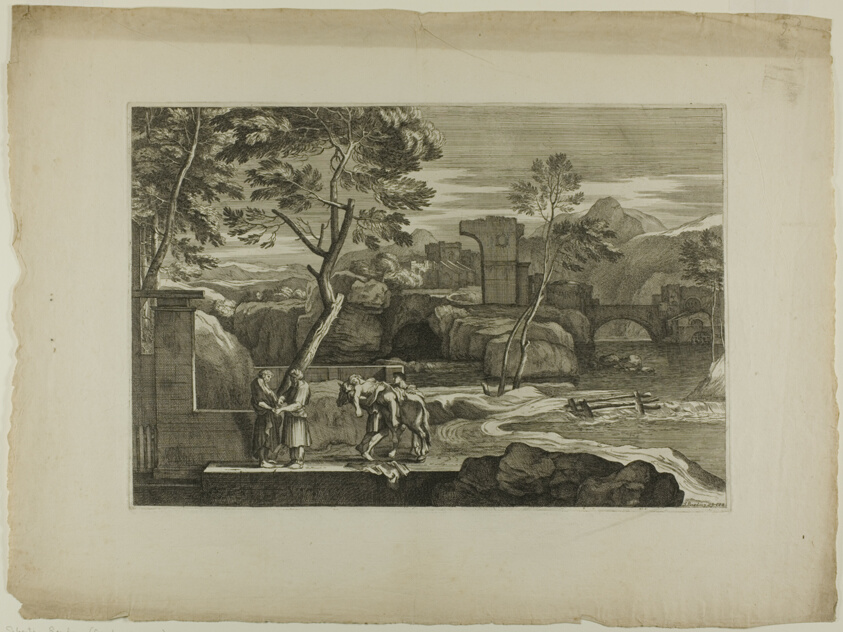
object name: Print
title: The Good Samaritan Takes the Wounded Man from his Donkey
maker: Sébastien Bourdon (French, 1616-1671)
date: 17th century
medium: Etching on ivory laid paper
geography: France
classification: etching; print; prints and drawing